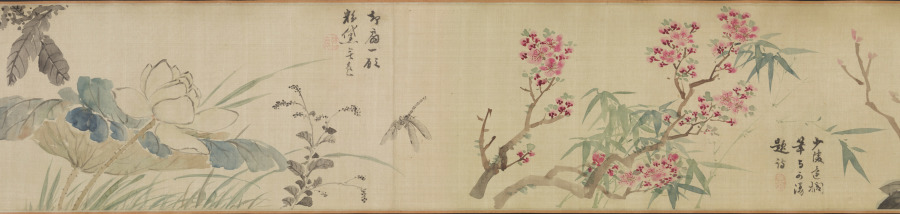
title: Flowers of Four Seasons, with Poems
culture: China, Ming dynasty (1368–1644)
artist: Wang Guxiang (Chinese, 1501–1568)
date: 1531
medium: handscroll; ink and light color on silk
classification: Painting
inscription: Artist's inscription, signature, and 15 seals. Ink Orchids. Sewn as pendants for the man of worth, swaying quiety, fragrance in the valley. [seal] Hsiao-chu ts'un Peony. Wiping his face, the young gentleman Ho [Ho Yen of Wei, Three Kingdoms] appears to have been powdered. His previous life was the perfume-stealing Han Shou [of Chin, 265–419 CE], the fragrance still lingers. [seal] Ts'un-wu chai. Flowering Crab Apple, New Bamboo. Shao-lin [Du Fu, 712–770] had to put down his brush. [Flowering Crab Apple]. Yü-k'o [Wen T'ung, d. 1079) in vain wrote poems about [Bamboo]. [seal] Yu-shih. Lotus Flowers. When she turns her head, half-hidden by a fan, and casts a glance, all the beautiful women become colorless. [seal] K'ang yüeh huai. Loquat. Ripeness in summer. [seal] Lu-chih. Pomegranate Flower. Whenever I remember you I will send my thoughts, but where have you gone--the [skirt] of pomegranate red? [seal] Wu-ho Sheng. Day Lily. Plant the day lily to forget sorrow. [seal] Yu-shih. Chrysanthemum. The untrammelled joy at the eastern fence. [seal] Lu-chih. Begonia. Comparing it to the beauties of Spring, and spreading them out as trimming for the stone steps. [seal] Yu-shih. Hibiscus. In recent years I have always enjoyed looking at flowers; instead of dark red I preferred pink ones. [seal] Jen-sheng i-lou. Narcissus, Camellia. The jade girdle left behind at Lo River. [Narcissus]. The precious pearls glitter before Spring. [Camellia]. [seal] Lu-chih. Heavenly Bamboo (Nandina domestica). A single branch in the wintry season. [seal] K'ang yüeh huai. Plum. Fragrant snow in the Lo-fou Mountains. [seal] Ts'un-wu chai. In the eleventh lunar month of the hsin-mao year of the Jiaqing era [1531], [I] imitated the boneless style of Yüan masters in sketching from life. Guxiang [seals] Yu-shih; Lu-chih. Translated by Wai-kam Ho/Lingyun Shih Liu (1980)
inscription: 2 colophons and 23 additional seals: 1 colophon dated 1632, and 2 seals of Li Jih-hua [Li Rihua] 李日華 (1565–1635); 1 colophon and 2 seals of Xiang Shengmo 項聖謨 (1597–1658); 3 seals of Liang Qingbiao 梁清標 (1620–1691); 6 seals of the Jiaqing 嘉慶 emperor (r. 1796–1820); 9 seals of Ch'eng Ch'i [Cheng Qi] 程琦 (1911–1988)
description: In this painting, flowers are loosely arranged by the seasons: narcissus and peony represent early spring; yellow loquat and lotus, summer; chrysanthemum, autumn; and the plum and evergreen bamboo, winter. The artist added to each flower a poetic line of calligraphy associating each plant with a historic or legendary figure. For example, the chrysanthemum, along with the line “The untrammeled joy at the eastern fence,” refers to the poet Tao Yuanming (died AD 427) who enjoyed chrysanthemums at the eastern fence in his garden. The scroll illustrates Wang Guxiang’s mastery of free brushwork, combining light monochrome ink with transparent colors. In his inscription, Wang says he used the “boneless” style without outlines as developed during the Yuan dynasty (1279–1368). Wang was a native of Changzhou, a city in southeast China known for its rich flora and fauna, and flower-and-bird painting tradition.